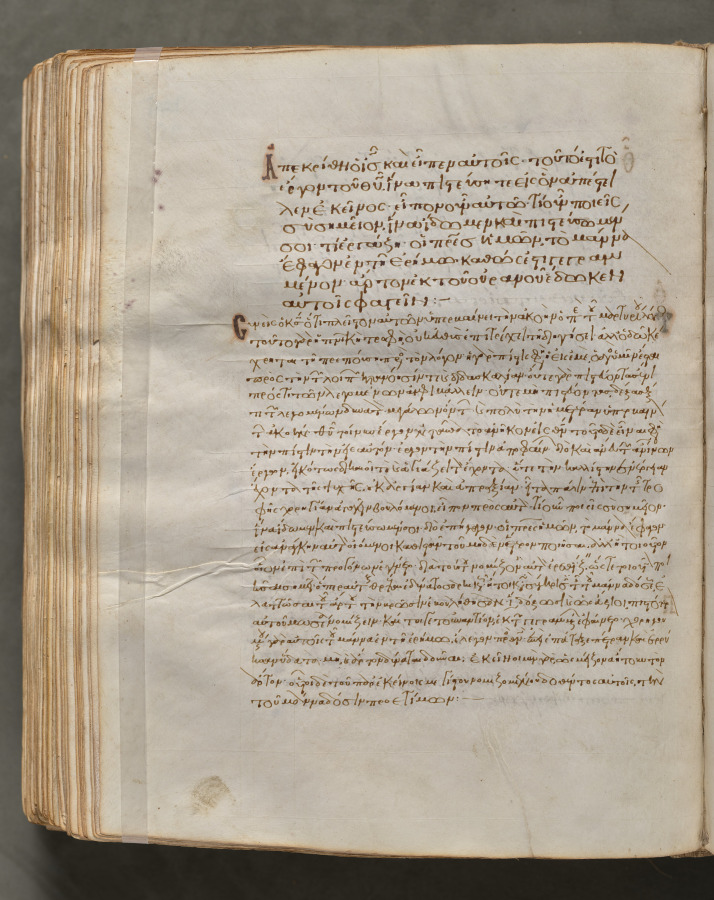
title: Text, folio 351 (verso), from a Gospel Book with Commentaries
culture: Byzantium, Constantinople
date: c. 1000–1100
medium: ink, tempera, and gold on vellum; leather binding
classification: Bound Volume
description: Each of the four gospels in this book opens on a page with brilliantly illuminated borders depicting the author of the text as well as birds—principally peacocks, symbols of the immortality of the soul—and fountains, representing the fountain of life and the salvation of the soul. This volume consists of 428 leaves with texts in Greek. Its level of sophistication suggests that it was probably written and decorated in a monastery in Constantinople.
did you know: Gospel books were carried in procession through Byzantine churches.